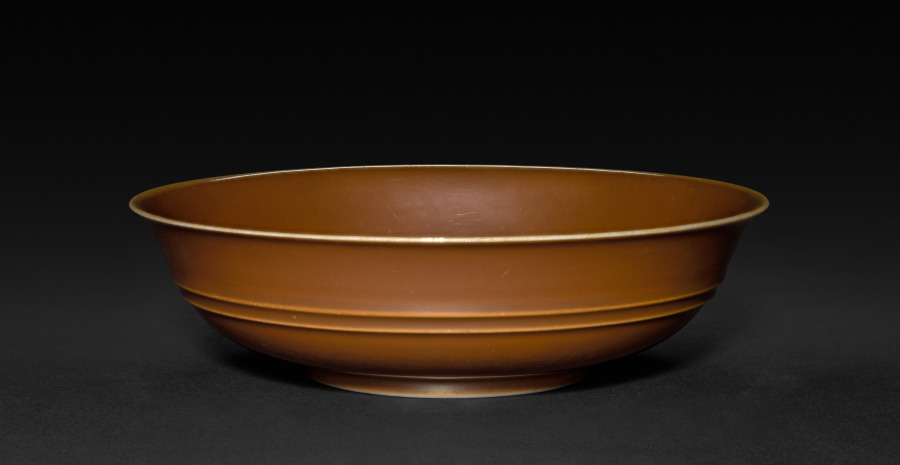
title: Dish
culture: China, Jiangxi province, Jingdezhen kilns, Qing dynasty (1644-1911), Yongzheng mark and reign (1723-35)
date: 1723–35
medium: porcelain with café-au-lait glaze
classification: Ceramic